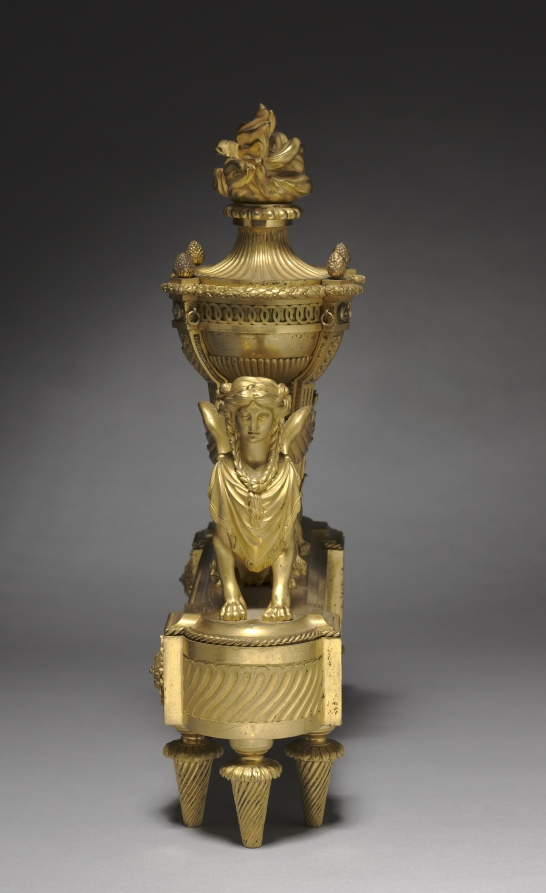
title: Firedog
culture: France, 18th century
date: c. 1785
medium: gilt bronze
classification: Furniture and woodwork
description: Although Louis Jean Desprez’s design was largely inspired by tombs in southern Italy, he added sphinxes in his print Tomb with Sphinx due to his fascination with ancient Egypt. Ancient Egyptians saw the sphinx, a half-human, half-lion mythological creature, as a protector of tombs and temples. The pair of andirons, decorative supports for a hearth’s firewood, alongside Tomb with Sphinx, highlight the growing interest in Egyptomania during the 1700s. Interestingly, the andirons portray ancient Greek and Roman interpretations of the sphinx. Most Europeans learned of ancient Egypt by studying Egyptomania in ancient Roman and Greek art and architecture or Egyptian antiquities brought over by the Romans.